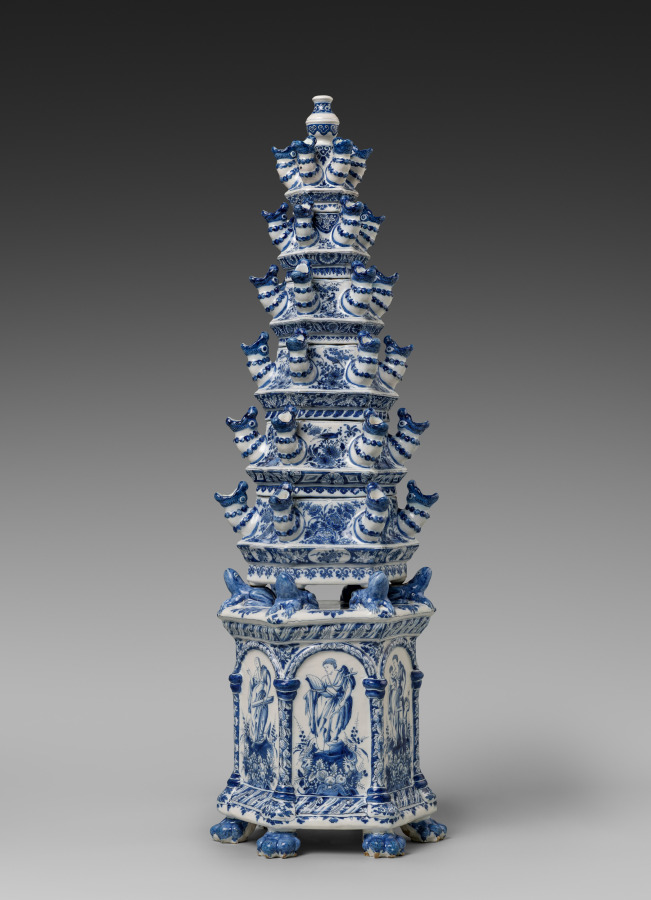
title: Flower Pyramid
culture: Netherlands, Holland, Delft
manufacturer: Adrianus Kocx (Dutch, active 1686–1701)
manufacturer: De Grieksche A (The Greek A) Factory (Netherlands, 1658–1811)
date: c. 1690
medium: Tin-glazed earthenware, painted in blue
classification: Ceramic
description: Allegorical figures representing Faith, Hope, and Love decorate the base of this pyramid, on which rest six tiers with spouts where flowers can be placed. Flower pyramids are among the most complex and luxurious types of ceramics produced in Delft in the late 1600s. This example was made in the Greek A Factory, owned by Adrianus Kocx. During his tenure, the factory became the most prestigious of Delft potteries and received commissions from Queen Mary II, who ruled over England, Scotland, and Ireland together with her husband, William III. She contributed to the international spread of the fashion for Delft ceramics.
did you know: The iconic blue-and-white ceramics from Delft originated as an attempt to copy Chinese porcelain.